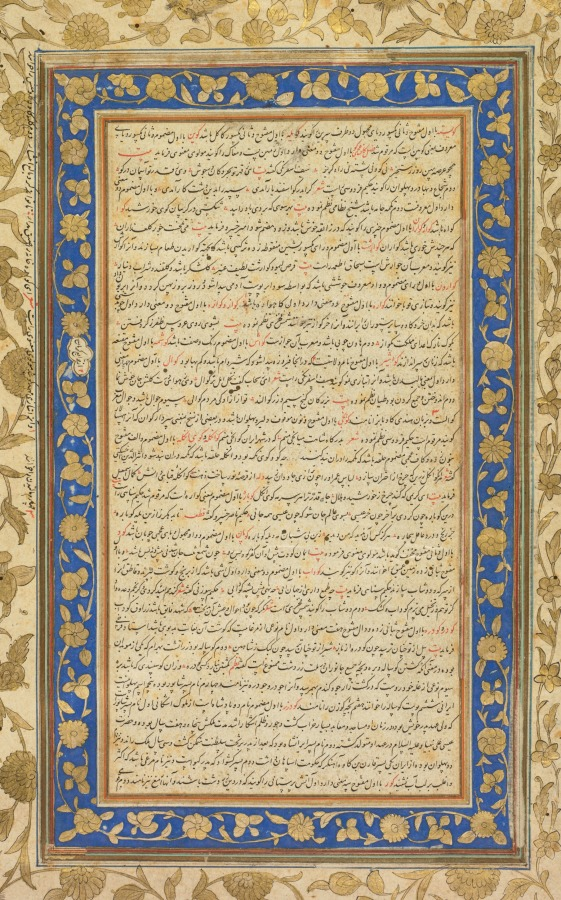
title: An Illuminated Folio from the Royal Manuscript of the Farhang-i Jahangiri (recto)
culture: Mughal India, court of Jahangir (1605–1627)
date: 1607–8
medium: Gum tempera, ink, and gold on paper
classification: Painting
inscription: Recto: “kuyesteh” (misspelling of “kunisteh,” meaning two halves of the buttocks) to “Gur” (name of a people in India)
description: Farhang-E Jahāngīrī, one of the most complete and authoritative dictionaries of the Persian language, was compiled by Mir Jamal al-Din Husayn Inju. It took him twelve years to compile over 9,000 words with definitions and examples from verses by Persian poets. He was born in Shiraz, Iran, but lived most of his life in Agra, India, so the dictionary was named honor of the Mughal emperor Jahangir, who reigned from 1605 to 1627.